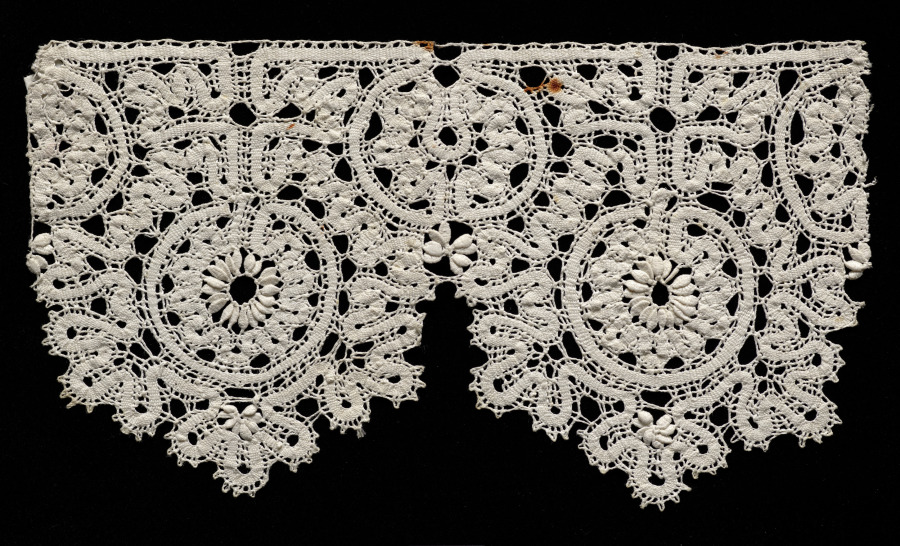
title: Lace Edging of Round Points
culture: Italy, Genoa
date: 1500s–1600s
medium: Bobbin lace (needle lace, punto in aria design)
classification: Lace